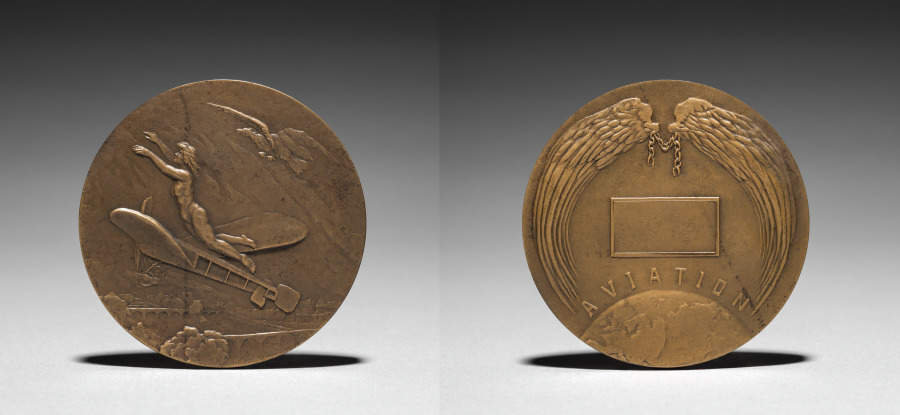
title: Medal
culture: France, 19th century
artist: F. Montagny (French)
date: c.1920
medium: bronze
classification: Metalwork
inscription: inscribed: F. Montagny.